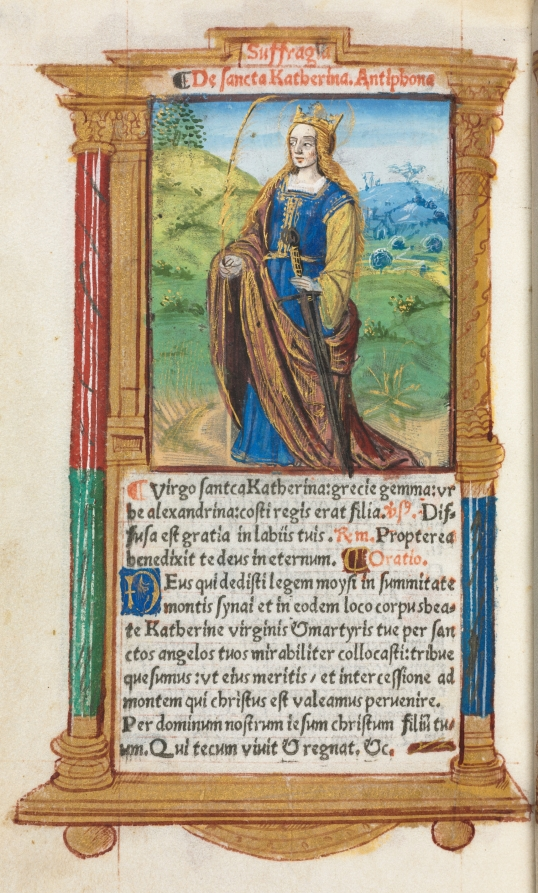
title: Printed Book of Hours (Use of Rome): fol. 109v, St. Catherine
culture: France, Paris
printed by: Guillaume Le Rouge (French, Paris, active 1493–1517)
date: 1510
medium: 112 Printed folios on parchment, bound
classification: Bound Volume